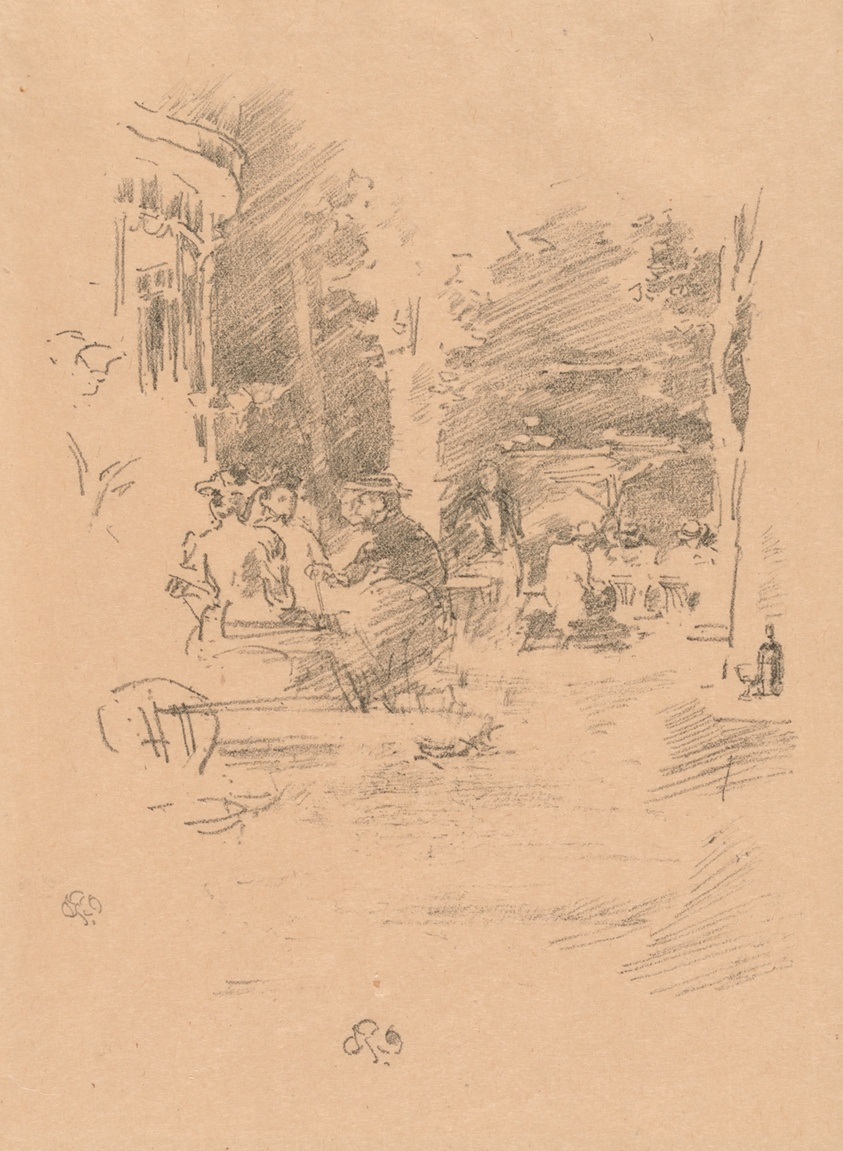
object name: Print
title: The Little Café au Bois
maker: James McNeill Whistler (American, 1834-1903)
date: 1894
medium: Transfer lithograph in black on cream Japanese proofing paper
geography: United States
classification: transfer lithograph; lithograph; print; prints and drawing; paper